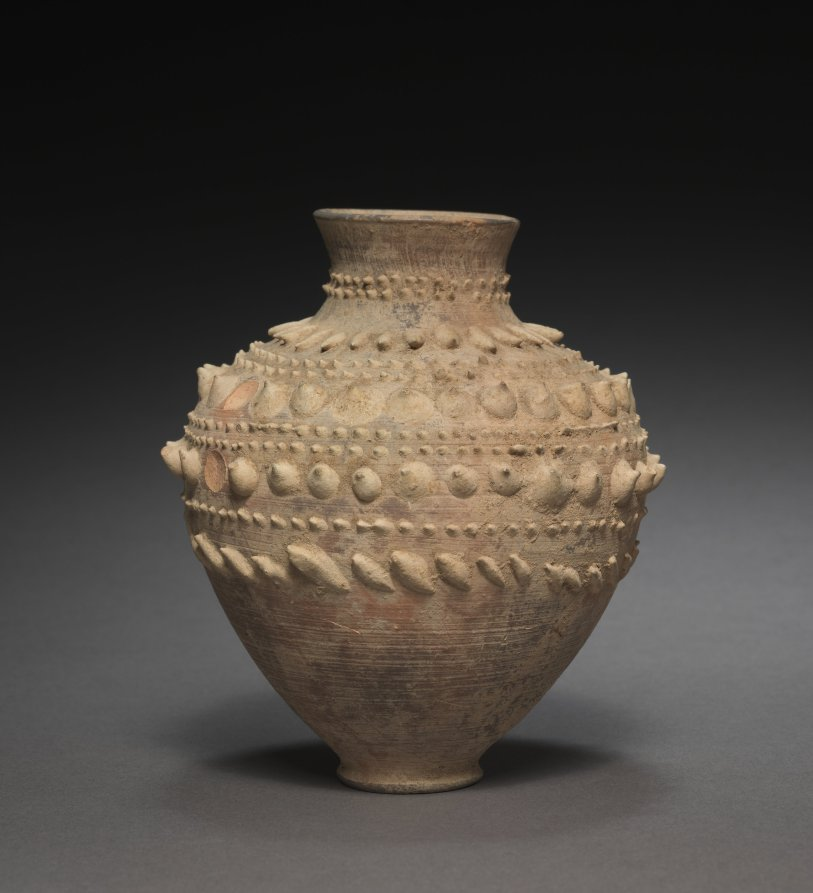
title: Barbotine Vase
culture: Egypt, Greco-Roman period (332 BCE–395 CE), Roman empire (30 BCE–395 CE)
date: 1–300 CE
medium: Marl clay ware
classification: Vessels